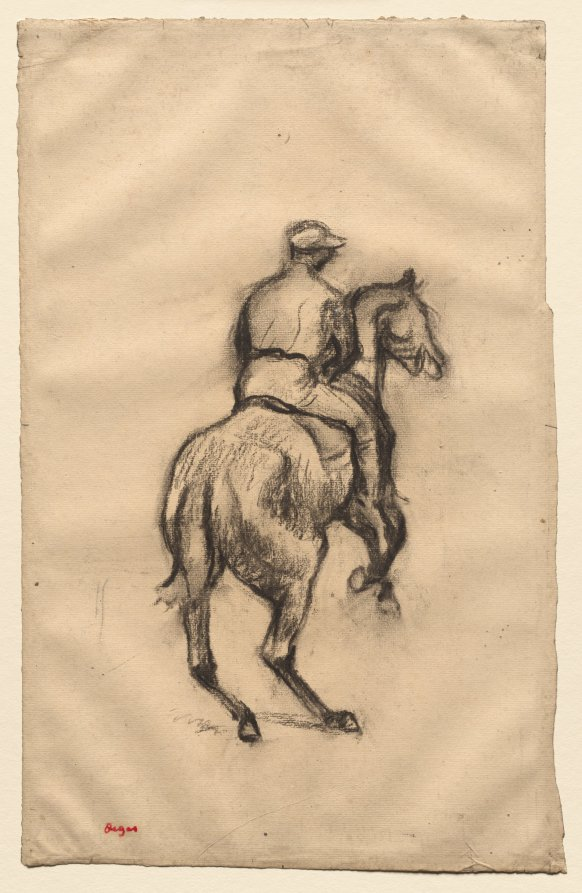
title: The Jockey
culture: France, 19th century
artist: Edgar Degas (French, 1834–1917)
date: c. 1885–1900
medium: charcoal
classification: Drawing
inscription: VERSO, upper left, in graphite: 1 [underlined] ; upper left, in red crayon: ch 20 ; center, in graphite: 29 1/2 46 / 17 17 / 11453 ; lower right, in blue crayon: Ph1421 / 2412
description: A study made for a larger racetrack composition rendered in pastel, Degas’s Jockey shows the attention that the artist lavished on perfecting the positions of the horse’s legs, hoofs, jaw straining against the bit, and the swish of the tail.